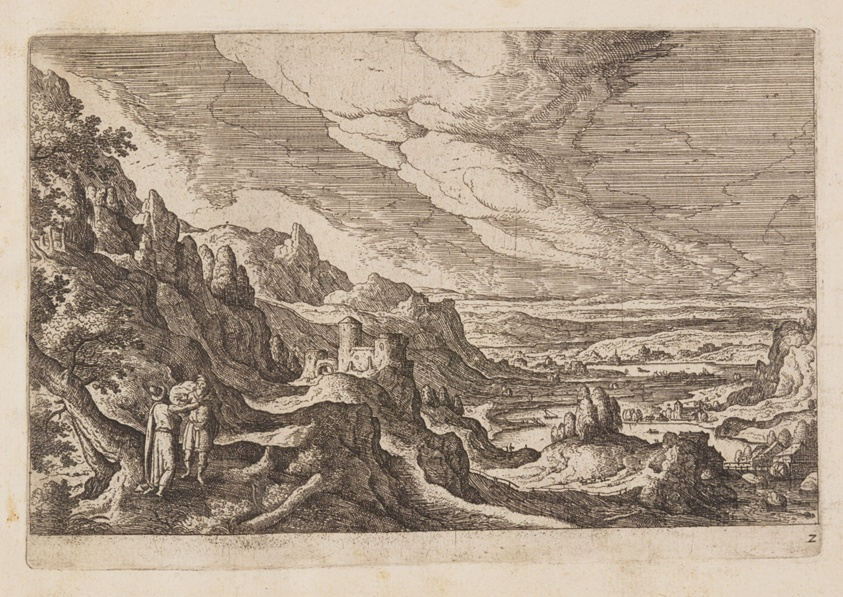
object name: Print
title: Plate 2, from Landscapes with Scenes from the Old and New Testament and Ovid’s Metamorphoses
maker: Hans Bol (Flemish, 1534–1593); published by Philip Galle (Flemish, 1537–1612)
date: 1574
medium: Etching on ivory laid paper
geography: Flanders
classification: print; paper; prints and drawing; etching